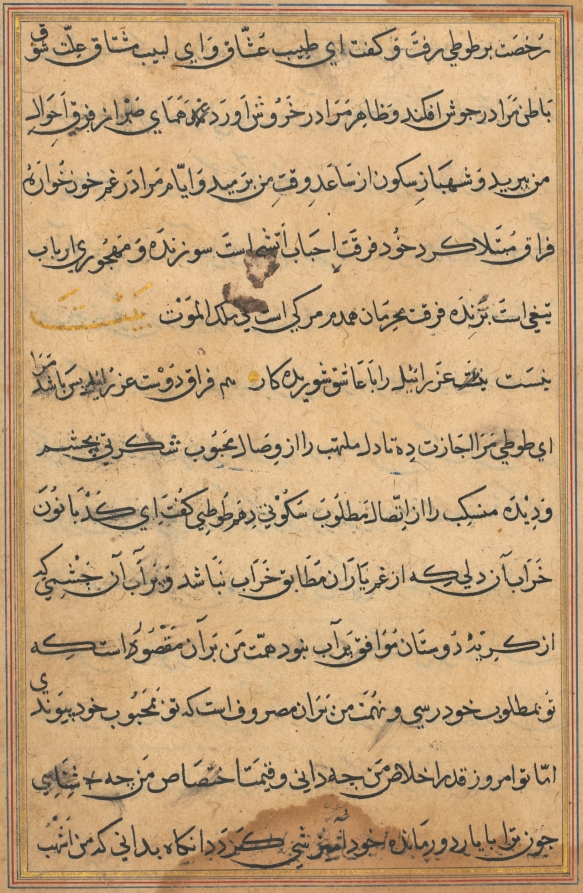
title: Page from Tales of a Parrot (Tuti-nama): text page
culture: Mughal India, court of Akbar (reigned 1556–1605)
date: c. 1560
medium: gum tempera, ink, and gold on paper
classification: Painting